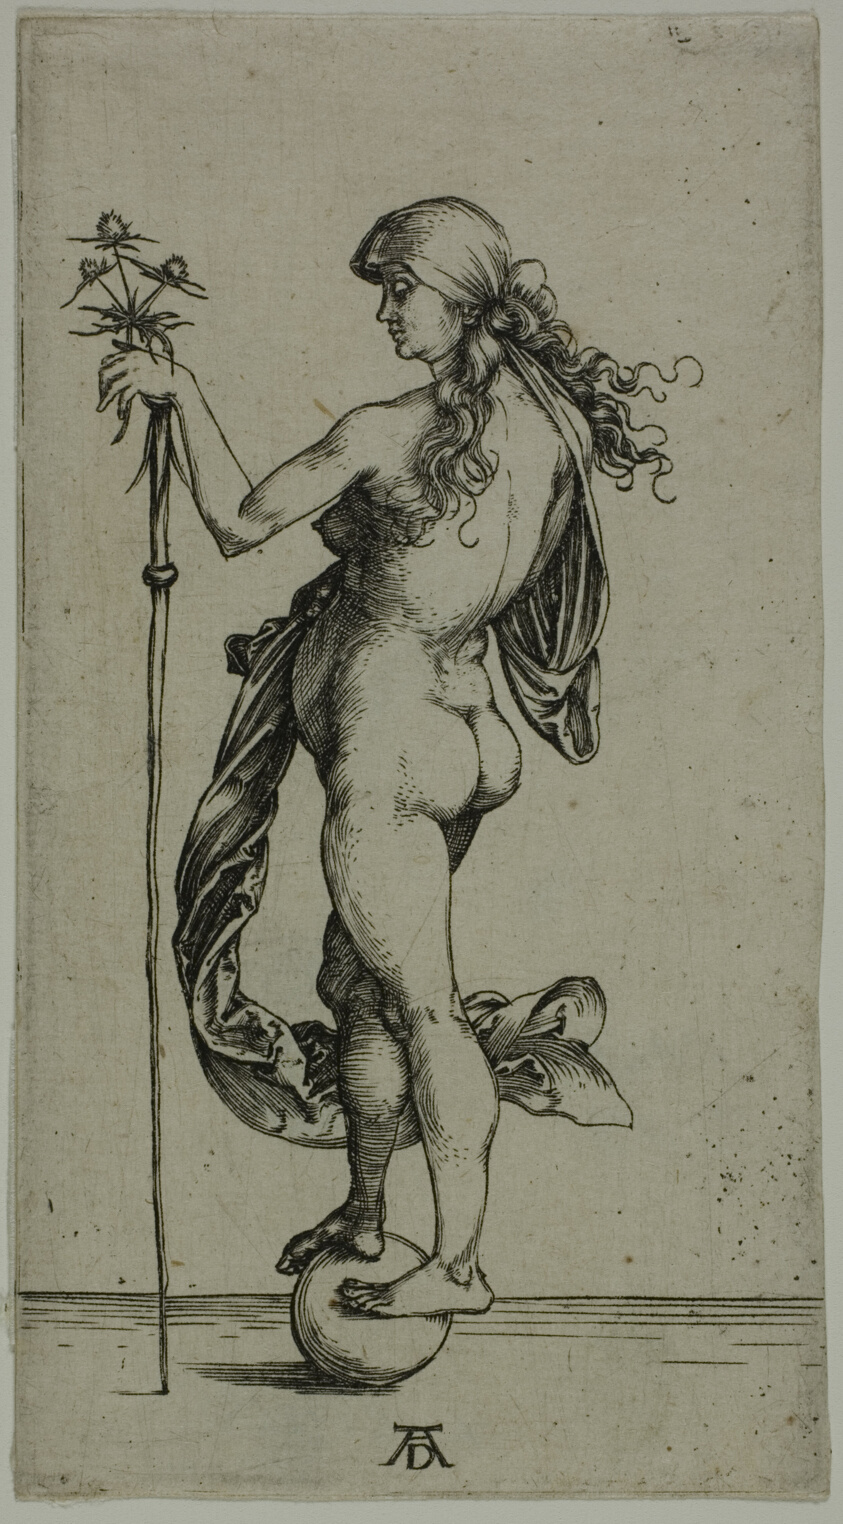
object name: Print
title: Fortune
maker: Albrecht Dürer (German, 1471-1528)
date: c. 1495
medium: Engraving in black on ivory laid paper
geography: Germany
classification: engraving; print; prints and drawing; paper